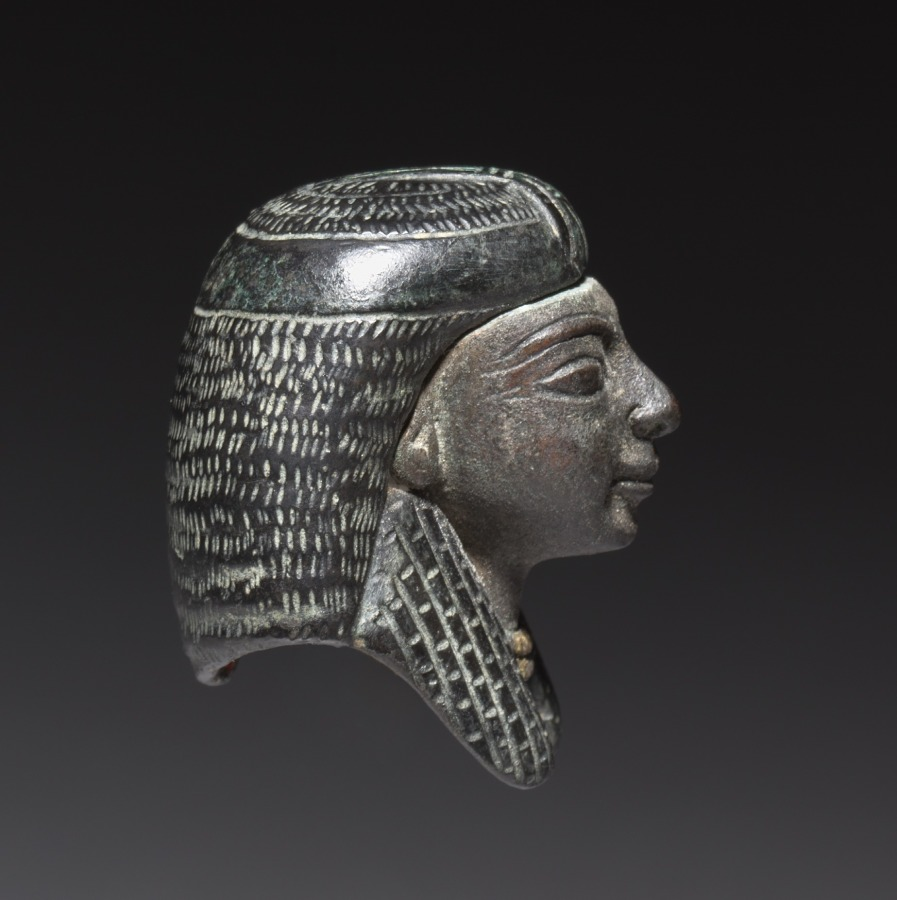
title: Bronze Mount from a "Shawabty Bundle": Head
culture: Egypt, Thebes, Wadi Qubbanet el-Qirud, New Kingdom (1540–1069 BCE), Dynasties 18–19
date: c. 1336–1256 BCE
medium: bronze, black copper wig, traces of gilding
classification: Funerary Equipment